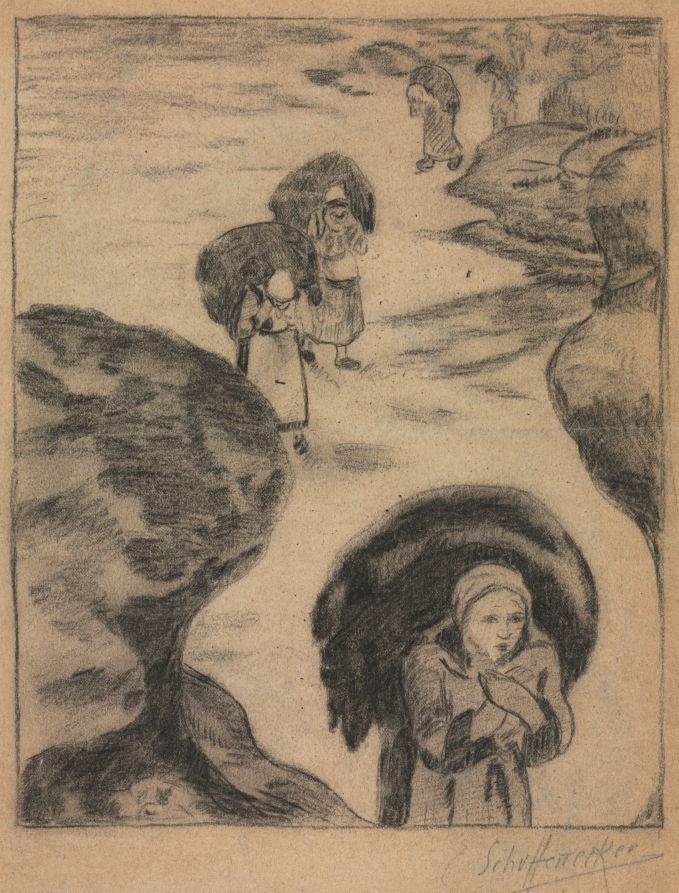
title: Seaweed Gatherers, Yport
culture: France, 19th century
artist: Claude-Emile Schuffenecker (French, 1851–1934)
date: c. 1889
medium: black chalk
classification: Drawing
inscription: signed, lower right, in graphite: Schuffenecker [underlined]; on verso, lower right, in graphite: P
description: Claude-Emile Schuffenecker worked closely with Paul Gauguin to form Synthetism, a style of art that broke from Impressionism in favor of flat planes of bold color and invented subjects. This drawing, which exists in two versions, is one of Schuffenecker’s most important works from the period. The other interpretation (owned by the Art Institute of Chicago) was featured in an influential 1889 exhibition organized by Gauguin and Schuffenecker at the Café Volpini on the grounds of the Universal Exposition. Both artists saw imagery of seaweed gatherers—a task undertaken by working-class people in rural French coastal towns—as exemplifying the simplicity they sought in their art.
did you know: This drawing is one of numerous depictions of seaweed gatherers that Claude-Emile Schuffenecker created throughout his career in various media.